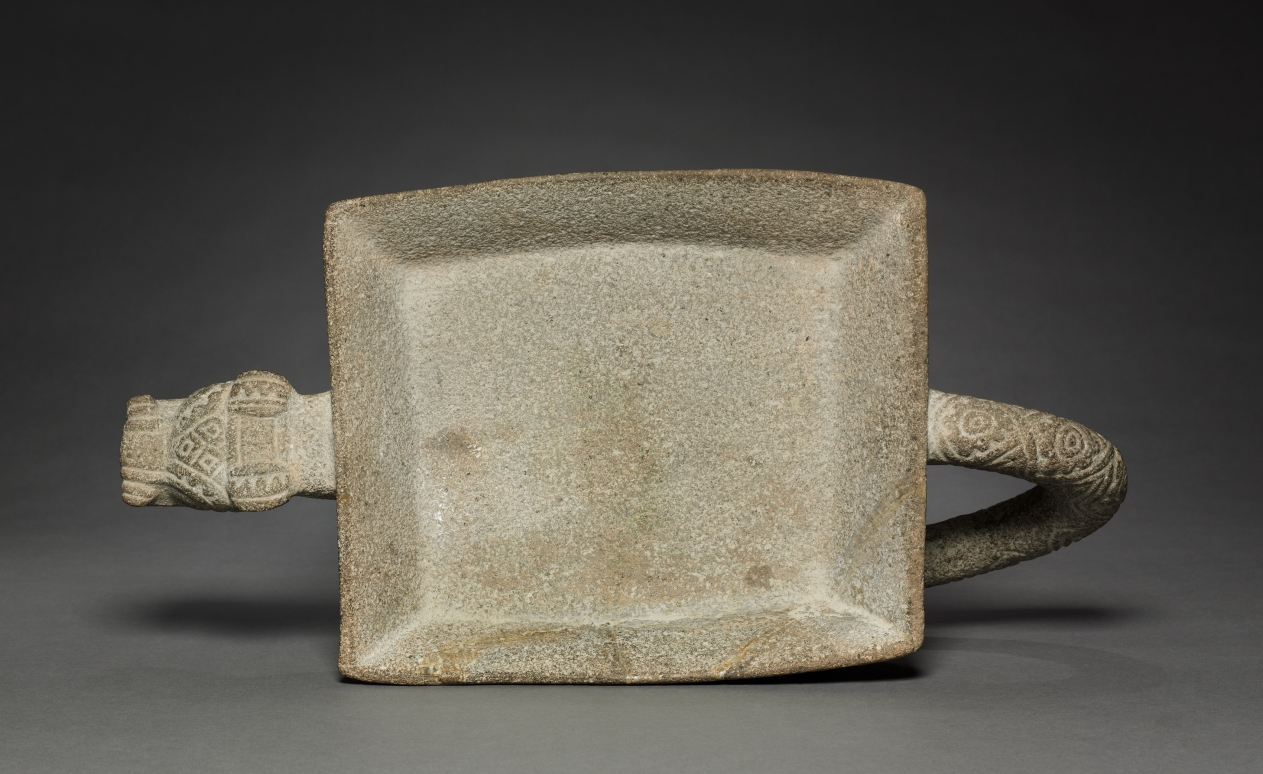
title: Jaguar Grinding Stone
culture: Costa Rica, Atlantic Watershed region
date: c. 1000–1550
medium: stone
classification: Sculpture